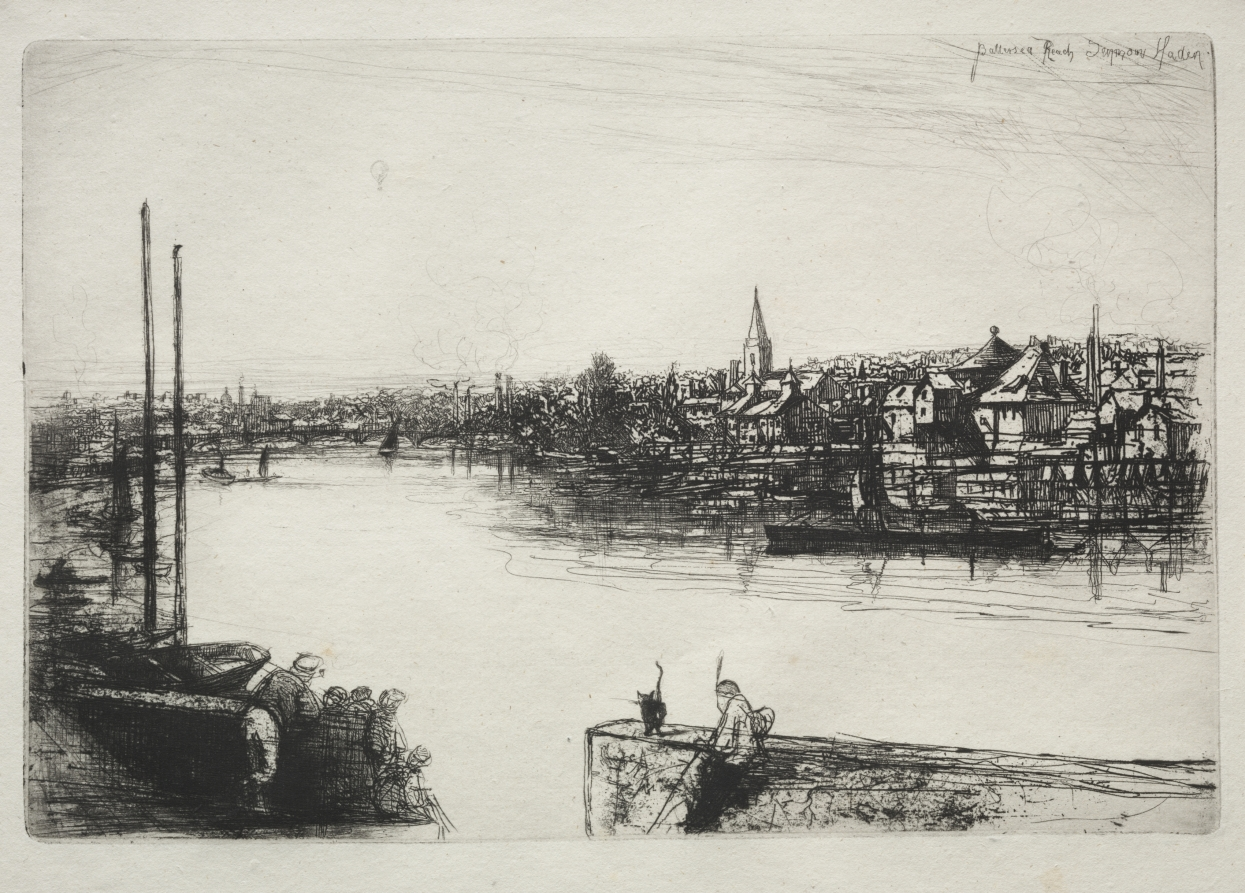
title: Battersea Reach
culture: England, 19th century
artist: Francis Seymour Haden (British, 1818–1910)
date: 1863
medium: etching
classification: Print